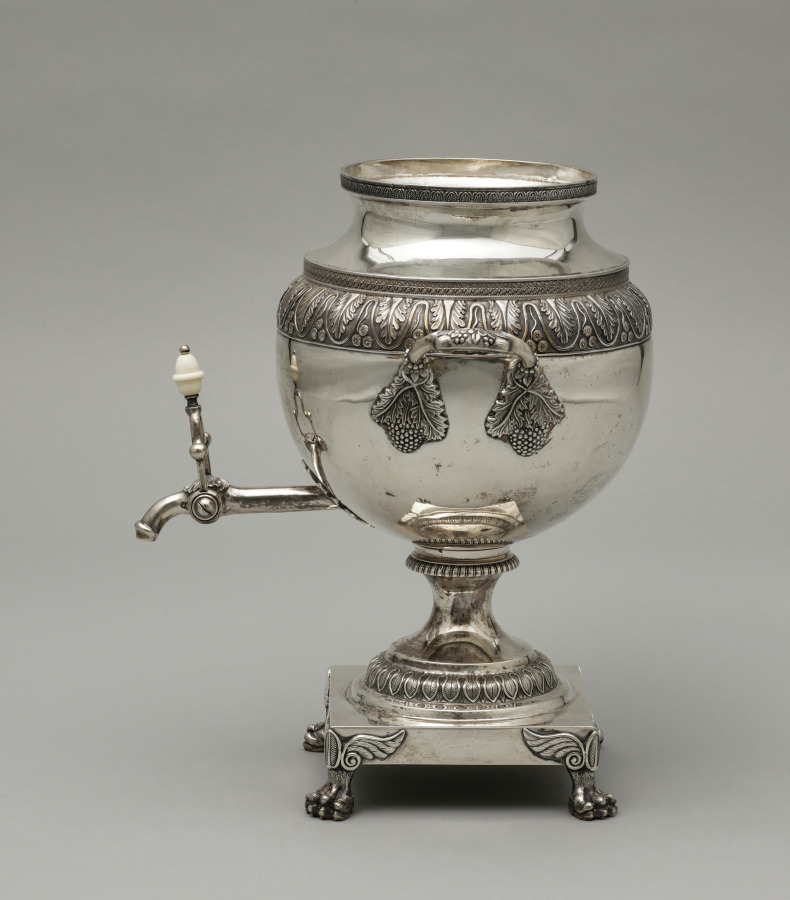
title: Tea Urn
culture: America, Pennsylvania, Philadelphia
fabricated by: Harvey Lewis (American, 1835)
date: 1811–25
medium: silver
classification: Silver